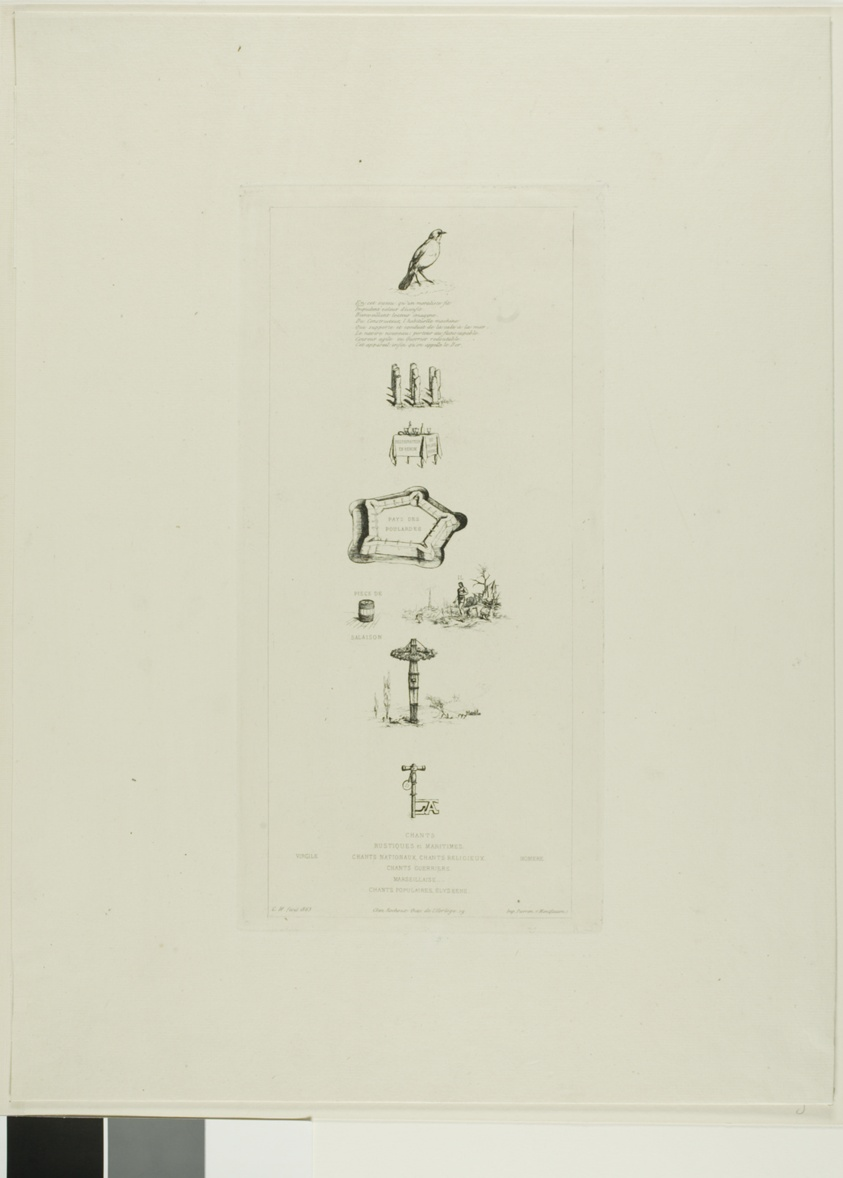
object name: Print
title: Rebus: Béranger was not Really Strong, for he Never had the Key of the Fields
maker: Charles Meryon (French, 1821-1868); printed by Pierron (French, 19th century); published by Rochoux (French, 19th century)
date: 1863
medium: Etching on ivory laid paper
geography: France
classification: etching; print; prints and drawing